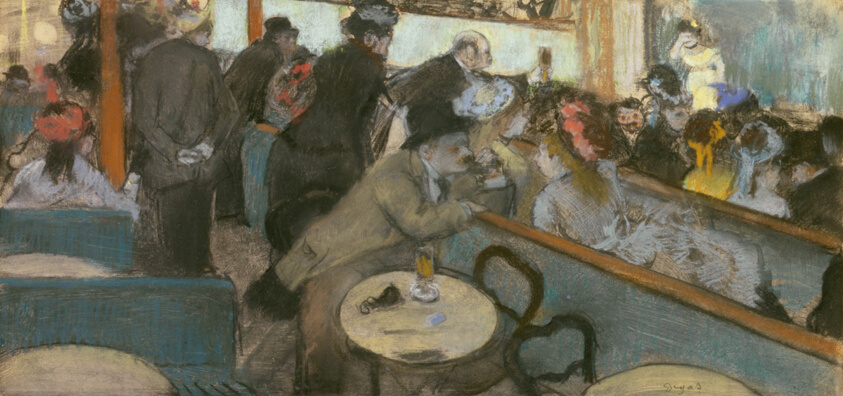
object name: Drawing and Watercolor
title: Café-Concert (The Spectators)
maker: Edgar Degas; French, 1834-1917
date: 1876/77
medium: Pastel over monotype on buff wove paper, laid down on tan card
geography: France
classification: prints and drawing; monotype; pastel; drawings (visual works); paper